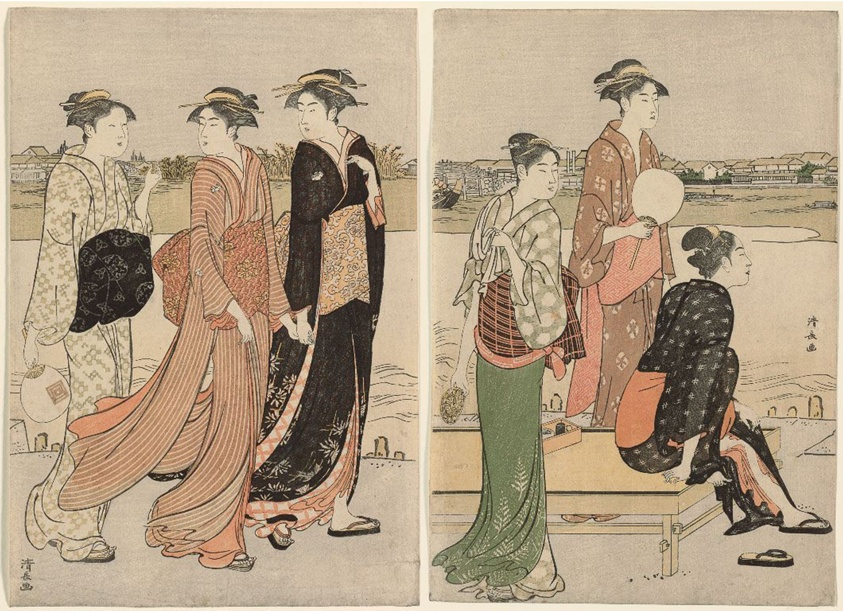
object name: Print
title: Summer Twilight on the Banks of the Sumida River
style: Japanese (culture or style)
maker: Torii Kiyonaga (Japanese, 1752-1815)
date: c. 1784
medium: Color woodblock print; oban diptych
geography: Japan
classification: woodblock print; print